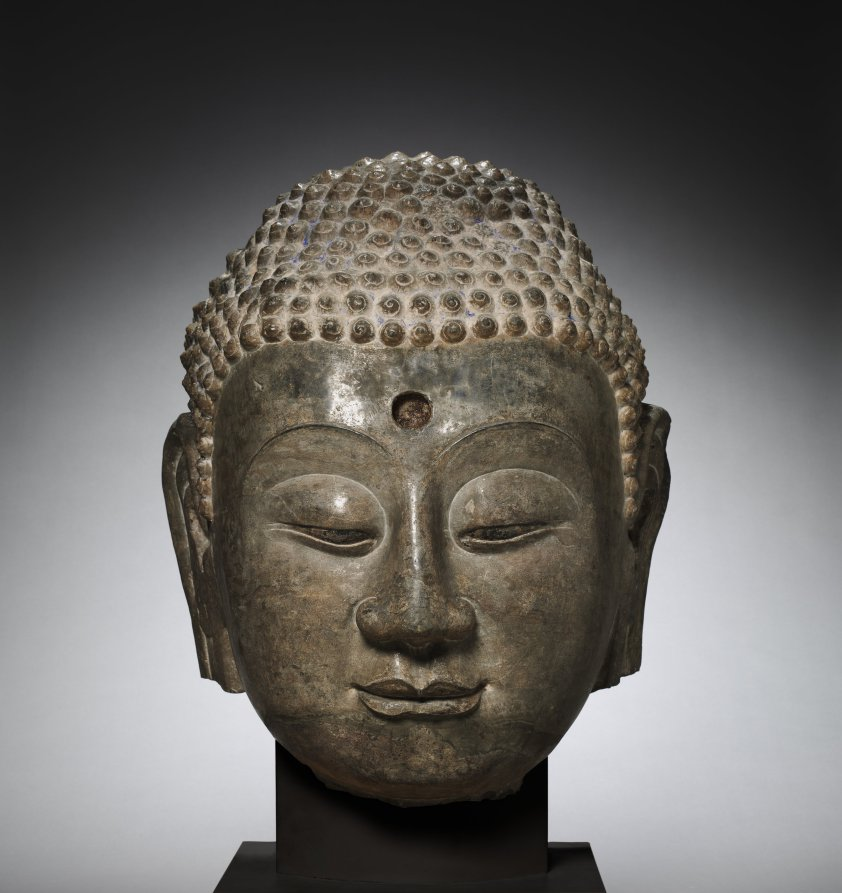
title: Head of Buddha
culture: China, Hebei province, northern Xiangtangshan caves, South cave, Northern Qi dynasty (550-577)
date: c. 570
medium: limestone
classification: Sculpture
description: At the Xiangtangshan Buddhist sites in Hebei province, cave-temple construction and image making were supported by the Northern Qi imperial court and nobility. Under the constant shadow of political uncertainty and the theory of the "Law of the Decadence" (or mofa, the deterioration of the True Law after the historical Buddha’s attainment of nirvana), the Buddhist faith was embraced as the ideal for rulership. The Buddha’s smile offers reassurance and consolation.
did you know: This colossal Buddha head is from the Northern Xiangtangshan's South Cave, which is shaped like a stupa with a domed roof and a porch in front.